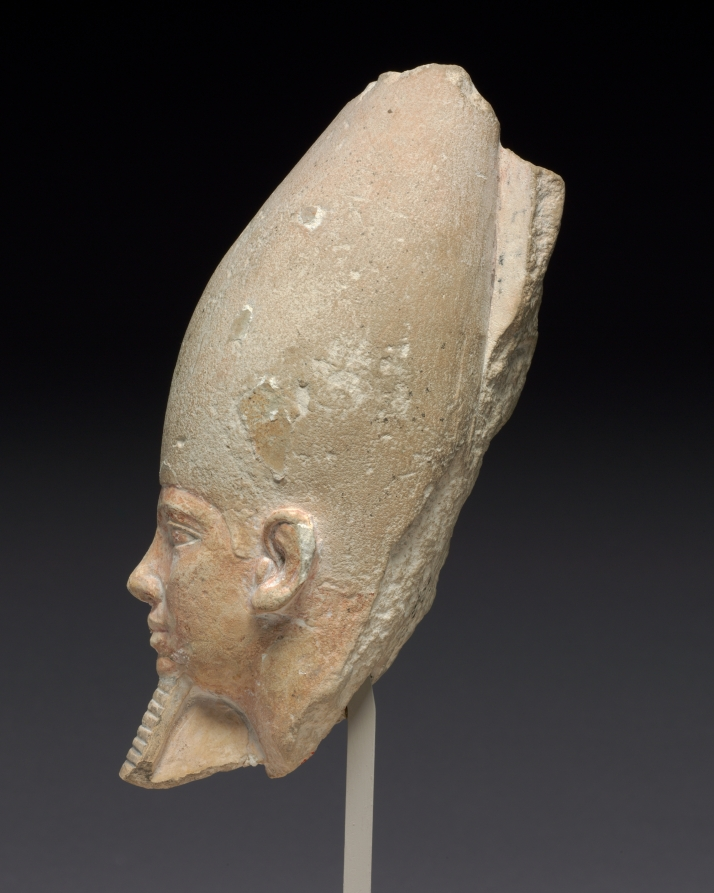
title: Head of King Userkaf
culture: Egypt, Old Kingdom (2647–2124 BCE), Dynasty 5, reign of Userkaf (2496–2491 BCE)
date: c. 2454–2447 BCE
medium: painted limestone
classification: Sculpture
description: Despite the monumental achievements of the Old Kingdom’s Pyramid Age, few images of its rulers survive. This head has been identified as King Userkaf, the first king of Dynasty 5. Userkaf built a modest pyramid at Saqqara and a temple to the sun god Ra at Abusir. According to later tradition, the first three kings of Dynasty 5 were the children of Ra himself and a mortal woman. From Userkaf’s reign on, the kings of Egypt were called "Sons of Ra." Here, Userkaf wears the two basic items of regalia that identify him as king: the tall, conical White Crown of Upper (southern) Egypt, and the royal false beard.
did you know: Visible chisel marks on the side of the crown imply that another figure once stood to the king's right; only a god or goddess could have stood in this prominent position.